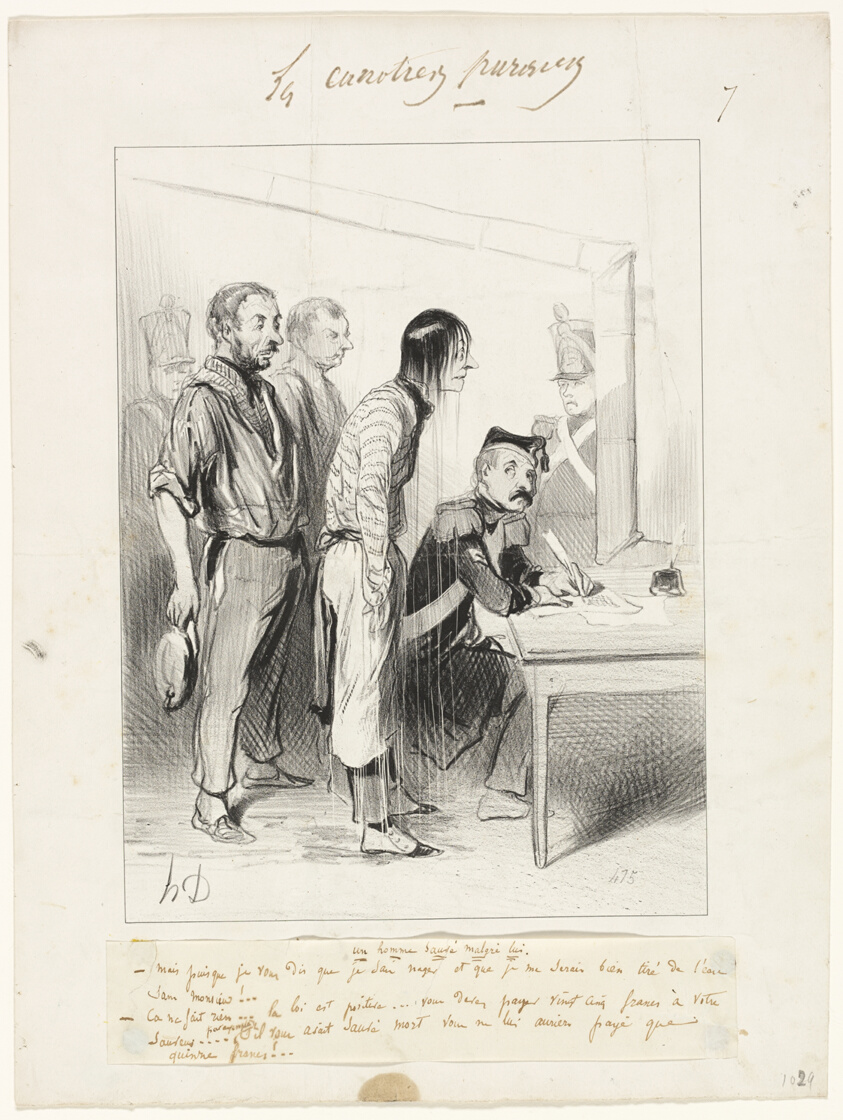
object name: Print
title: A Man Saved Against his Will, plate seven from Les Canotiers Parisiens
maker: Honoré-Victorin Daumier (French, 1808-1879)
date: 1843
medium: Lithograph in black, with additions in pen and brown ink (discolored to grayish brown) and caption in pen and brown ink, on ivory wove paper, tipped onto ivory wove paper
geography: France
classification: lithograph; print; prints and drawing